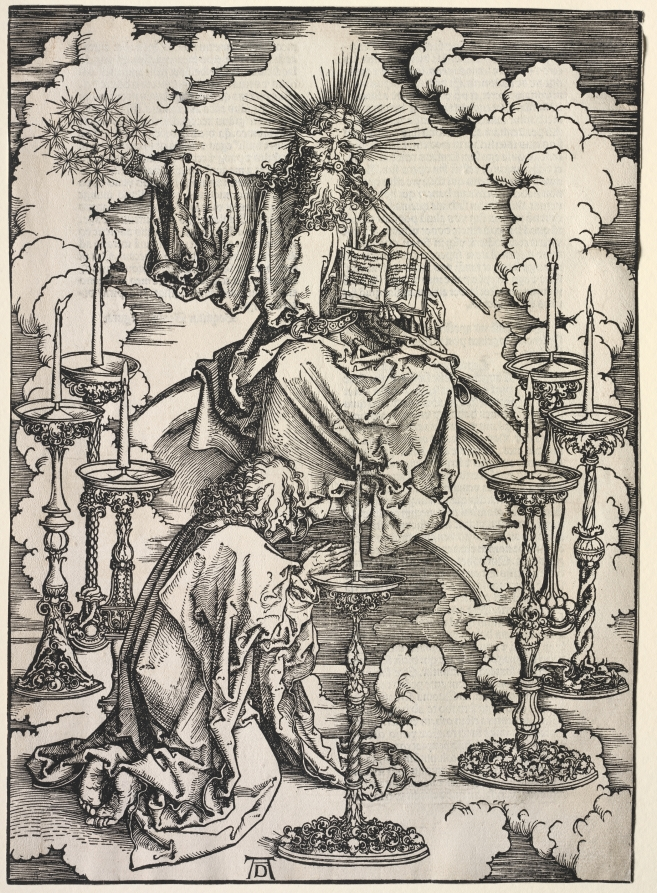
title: Revelation of St. John: St. John Beholding the Seven Candlesticks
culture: Germany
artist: Albrecht Dürer (German, 1471–1528)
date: 1511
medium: woodcut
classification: Print